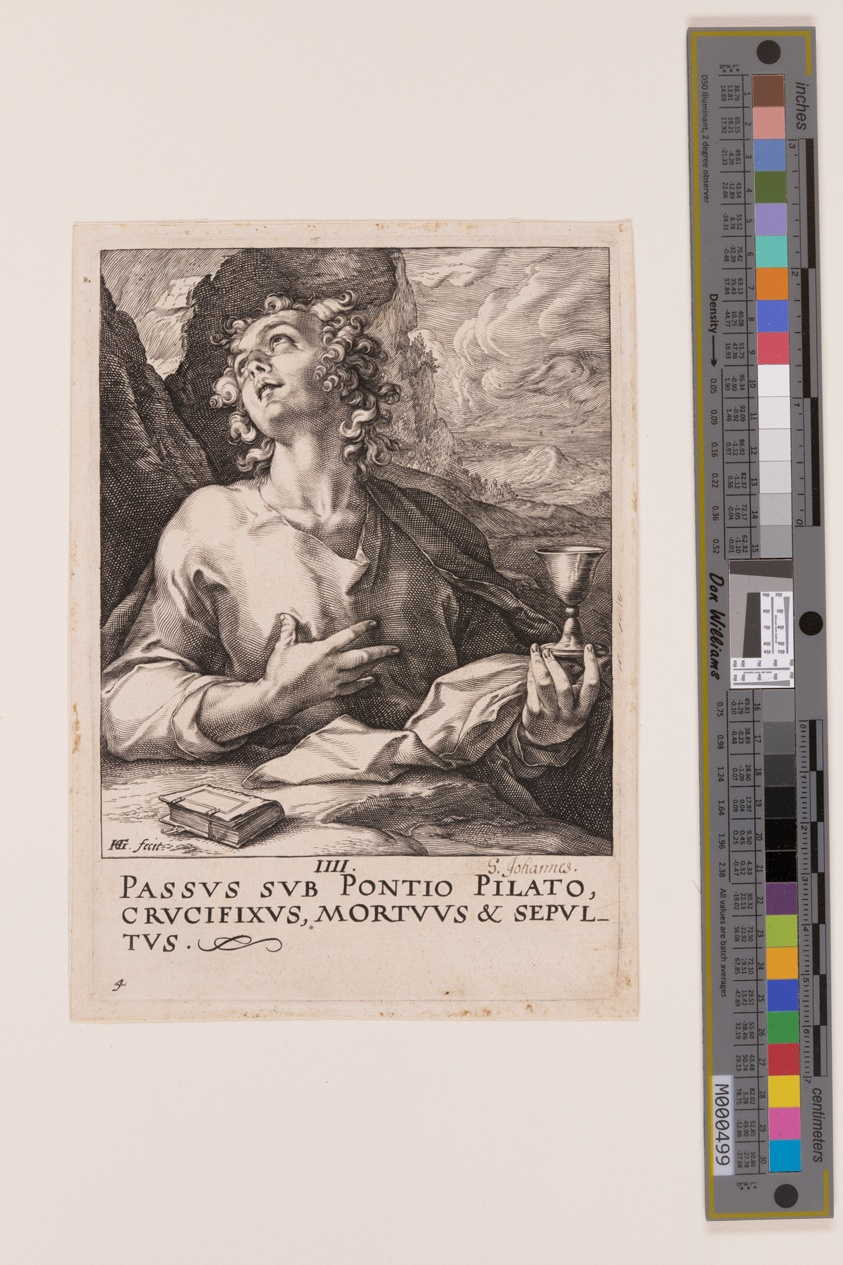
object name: Print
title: St John, from Christ, the Apostles and St Paul with the Creed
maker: Hendrick Goltzius (Dutch, 1558–1617)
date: 1589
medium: Engraving on ivory laid paper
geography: Netherlands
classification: engraving; paper; print; prints and drawing